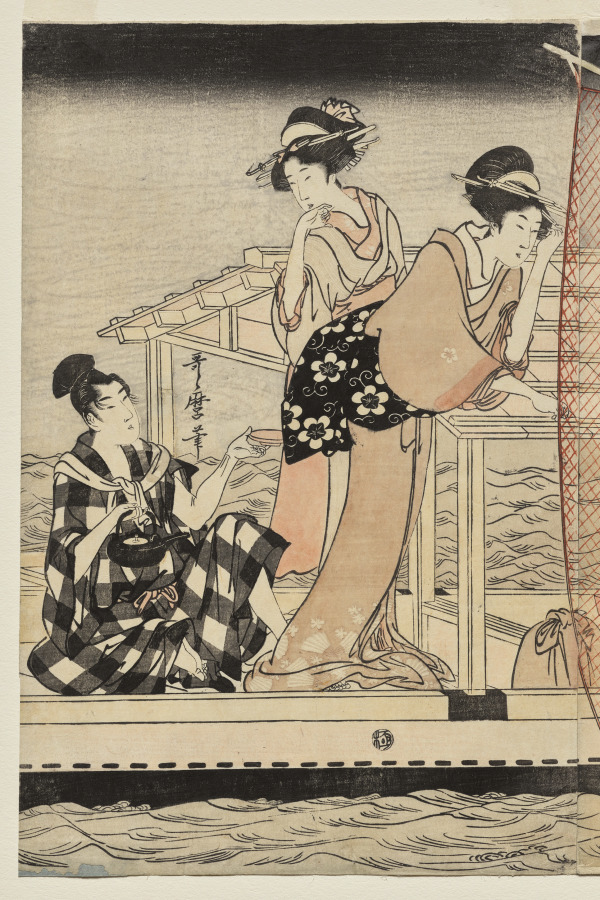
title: Net Fishing at Night on the Sumida River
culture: Japan, Edo period (1615–1868)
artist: Kitagawa Utamaro (Japanese, c. 1754–1806)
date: c. 1800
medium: One of a triptych of color woodblock prints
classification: Print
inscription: Signature: Utamaro hitsu Censorship Seal: kiwame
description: Pleasure-boating in the evening on the Sumida River to escape the summer’s heat was about as popular as viewing cherry blossoms in spring for Edo townspeople. The river also led the way to the Yoshiwara, the licensed brothel district. A boating party with courtesans and gentlemen jostles up next to afishing boat. Utamaro enjoyed portraying a scene through the design of a fishing or mosquito net. The different colors of the net suggest these impressions may be from two different series.